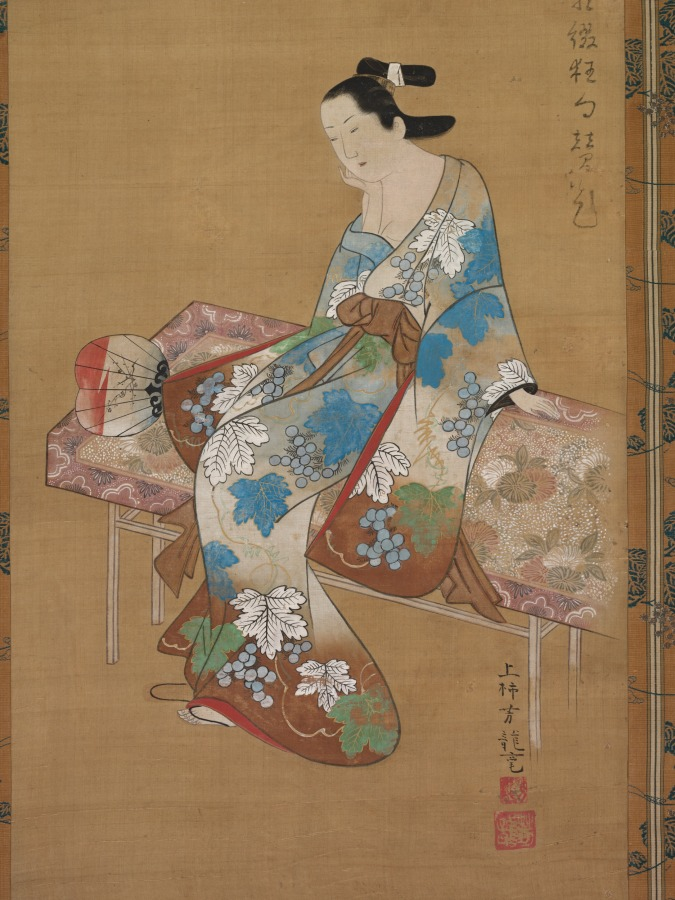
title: Courtesan Seated on a Bench Enjoying the Evening Cool in Summer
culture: Japan, Edo period (1615–1868)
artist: Kamigaki Hōryū (Japanese, dates unknown)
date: 1615–1868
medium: hanging scroll, ink and color on silk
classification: Painting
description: In a pensive pose with her chin resting in her hand, a courtesan is seated on a wooden bench that extends diagonally across the lower half of the scroll. Her open robe suggests that it is a warm evening-perhaps late summer or early fall, as indicated by the grapevine pattern on her kimono. The floral patterns in the composition hint at the seasons: the plum blossom on the fan for spring; grape pattern on the robe for late summer; and chrysanthemum design on the bench indicating autumn. Note also how the grapevine pattern in the painting's mounting mimics the design of her kimono. The overall mood is one of intimacy, created by Hõryþ through the delicate rendering of the courtesan's facial features and hands. In contrast to the other scrolls of beauties nearby, the artist here portrayed his subject with little background, allowing her grace and elegance to carry the picture.